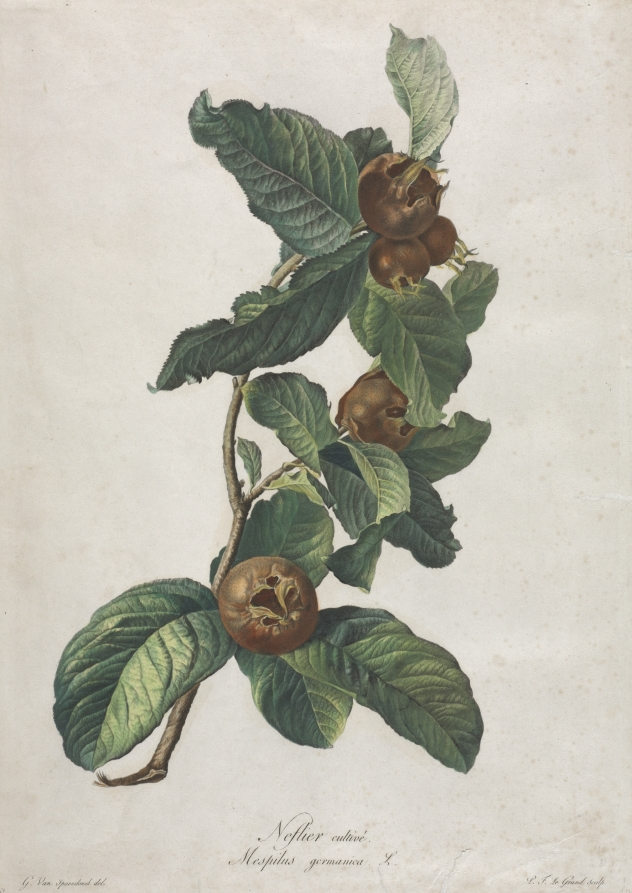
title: Cultivated Medlar (Mespilus germanica)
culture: Netherlands, late 18th-early 19th Century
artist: Gerard van Spaendonck (Dutch, 1746–1822)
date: c. 1800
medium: stipple engraving with roulette, hand-colored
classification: Print